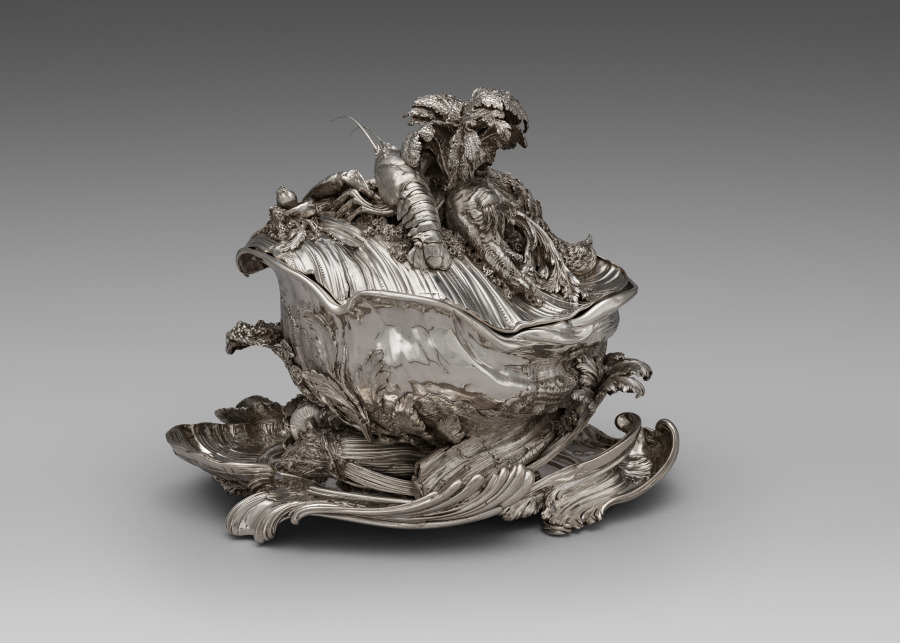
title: Covered Tureen on Stand (Pot-à-oille)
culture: France, Paris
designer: Juste-Aurèle Meissonnier (French, 1695–1750)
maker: Pierre-François Bonnestrenne (French)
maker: Henry Adnet (French, 1745)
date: 1735–38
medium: silver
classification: Silver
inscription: [Maker’s mark of Pierre−François Bonnestrenne, beneath platter; inside tureen (two marks)]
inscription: [Warden's mark for Paris, 1734−1735, beneath platter; inside tureen; inside cover]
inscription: [Charge mark of Hubert Louvet, Paris, 1732-1738, on platter border; beneath platter; beneath tureen; inside cover; inside tureen (two marks)]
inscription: [Discharge mark of Louis Robin mostly used for stamping small work, Paris 1738−1744, on platter border; beneath tureen]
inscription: [Warden's mark for Paris, 1736−1737, on platter border]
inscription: [Possibly British import mark, London, 1925, on platter border]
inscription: [Possibly mark of the British firm Charles & Richard Comyns, on platter border]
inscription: [Discharge of Louis Robin mostly used for stamping gold and silver between 1738 and 1744, beneath tureen; outside cover]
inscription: [Maker’s mark of Henry-Guillaume Adnet, inside cover]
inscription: [Two small undefined marks, inside cover]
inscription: [Under the surface of the platter the engraved signature]: “FAIT-PAR-I-A-MEISSONIER-ARCHITECTTE”; [and the weight] “673=5"; “No. [v] I 50 £ b76Sol”; [and the numbers] “A nº 1”; “A nº2”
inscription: [On tureen lip]: "MEISSONIER"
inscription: [On tureen lip]: “A nº 3”; “A nº2” [in order to place the tureen correctly on the stand]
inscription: [Numbers engraved on the stand, the tureen, and the cover to show how the piece should be assembled]: “A nº 1” [on the base of the tureen; beneath the cover; on the platter], “A nº 2” [on the platter], “A nº 3” [on the exterior rim of the tureen], “A nº4”; “A nº 5” [outside the cover], “A nº 7” [on the border of the platter]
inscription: [Two warden's marks for Paris, 1735-1736, beneath tureen]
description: This tureen exemplifies the French Rococo style, an artistic movement celebrating naturalistic forms that developed in Paris during the early 1700s. In contrast to classical, controlled symmetry, Rococo forms morph, twist, and spill into the space around them. Meissonnier embellished this tureen in a picturesque arrangement of vegetables and creatures, transforming a utilitarian object into a decadent display of wealth and abundance. This masterpiece comes from a set of two tureens commissioned by the English Duke of Kingston during an extended stay in Paris in the 1730s.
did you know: The langoustine, pigeon, and vegetables were cast using real examples giving the silver copies lifelike detail and appearance.